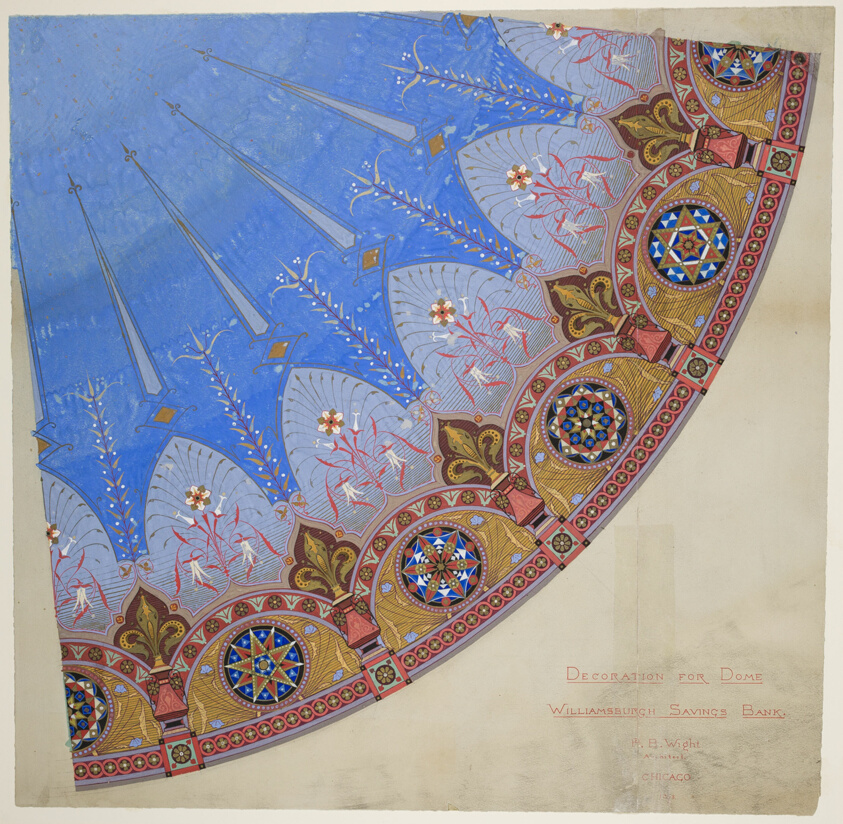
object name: Architectural Drawing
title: Williamsburg Savings Bank, Brooklyn, New York, Dome Decoration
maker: Peter Bonnett Wight (American, 1838-1925)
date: 1873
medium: Graphite, watercolor, and gouache on paper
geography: Brooklyn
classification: presentation drawing; architecture; architectural drawing